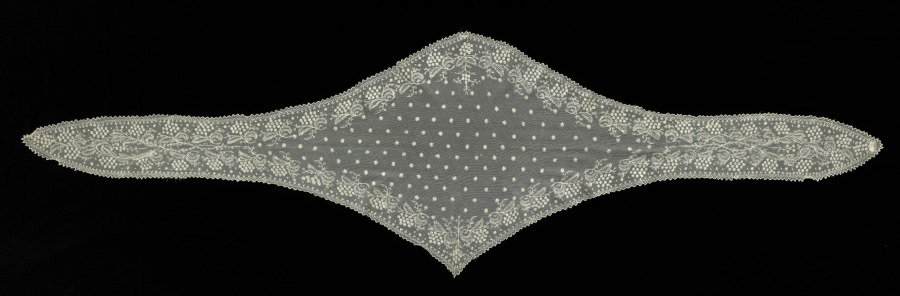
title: Lace Kerchief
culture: Ireland, Limerick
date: 1800s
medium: Machine-made net; cotton embroidery in tambour stitch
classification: Lace